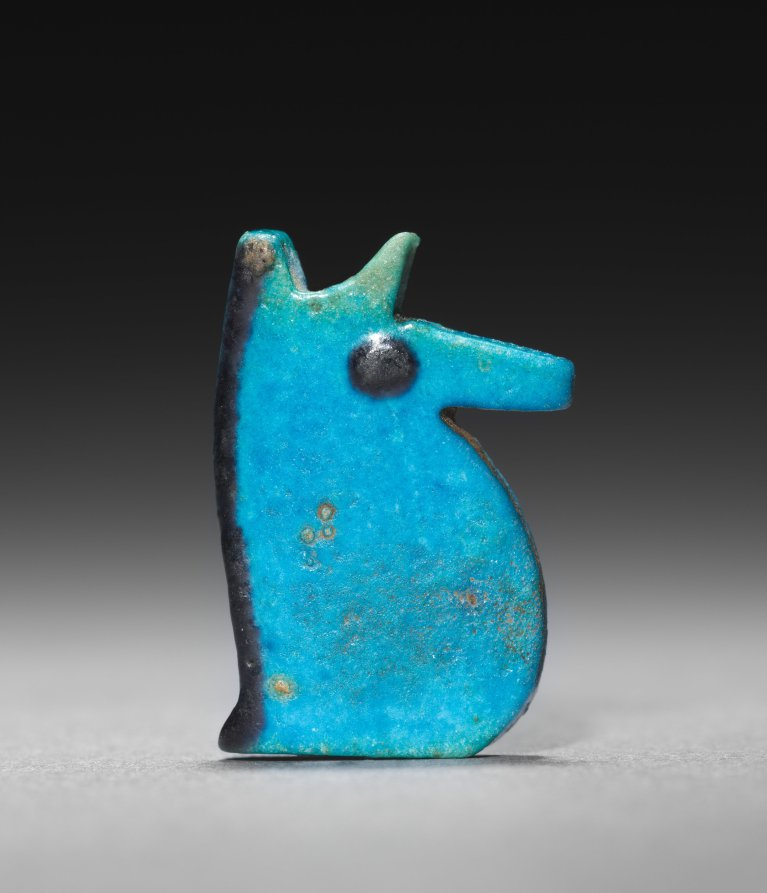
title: Eye of Horus Amulet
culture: Egypt, Third Intermediate (1069–715 BCE), Dynasties 22–25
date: 945–715 BCE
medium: turquoise faience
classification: Amulets